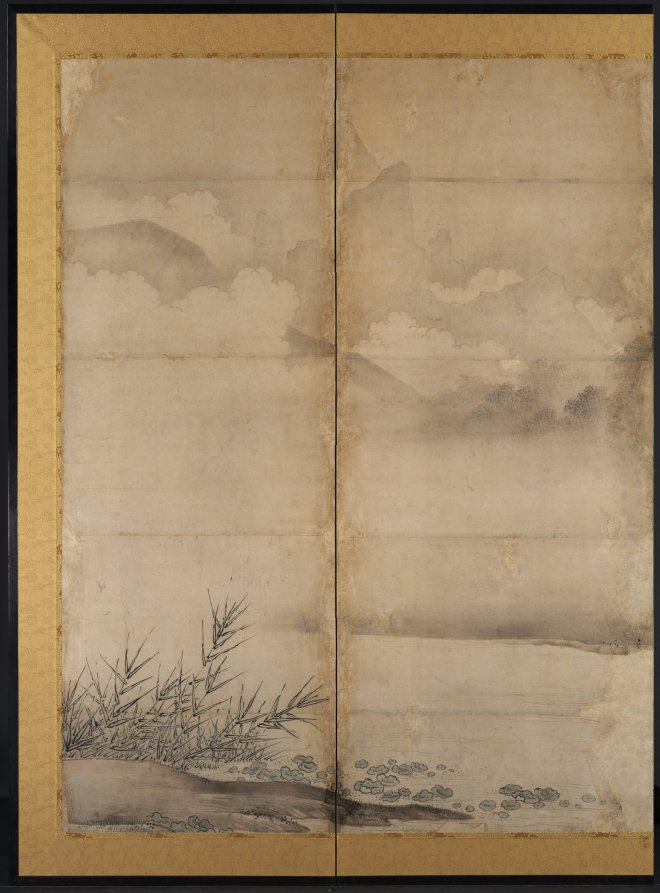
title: The Four Accomplishments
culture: Japan, Momoyama period (1573–1615)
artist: attributed to Kano Shōei (Japanese, 1519–1592)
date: late 1500s–early 1600s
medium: One of a pair of six-panel folding screens; ink and slight color on paper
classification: Painting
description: This is one of a pair of screens that shows a group of elite Chinese gentlemen and their servants in the countryside. One man looks on as two of his companions play a board game. Nearby is a table set with a selection of books and a qin, a type of stringed instrument, still wrapped in its cloth case, waiting to be played. The mood is one of enjoyment balanced with formality. Historically, playing the qin or qi (a game similar to chess called go in Japan), and practicing or admiring calligraphy were considered three skills essential for cultured men in China.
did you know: One of the servants is diverted by the motion of a fish in the water.